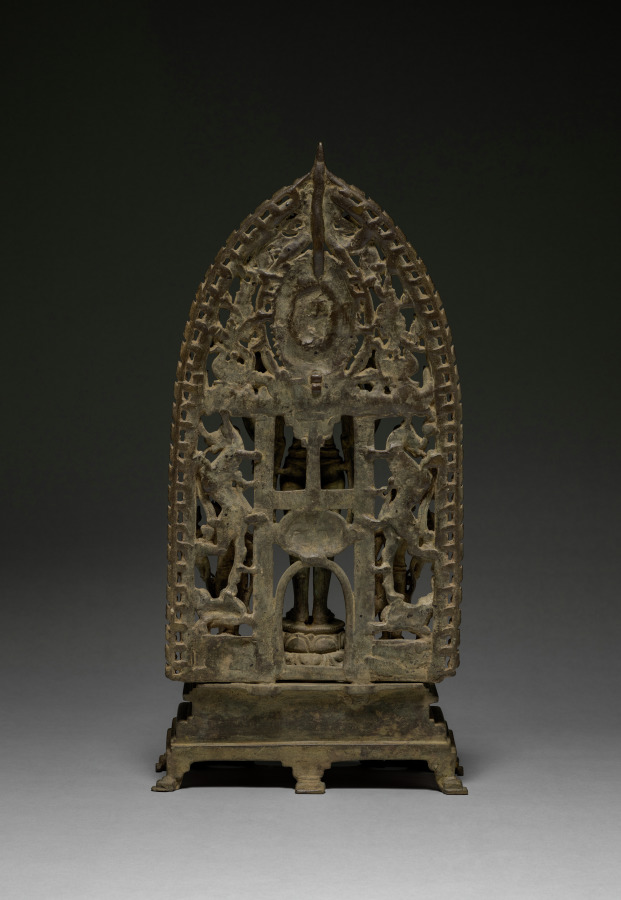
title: Vishnu Attended by Chakrapurusa and Shankhapurusa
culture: East India, Bengal, Pala period, 11th-12th century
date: 1000s–1100s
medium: bronze with silver inlay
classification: Sculpture